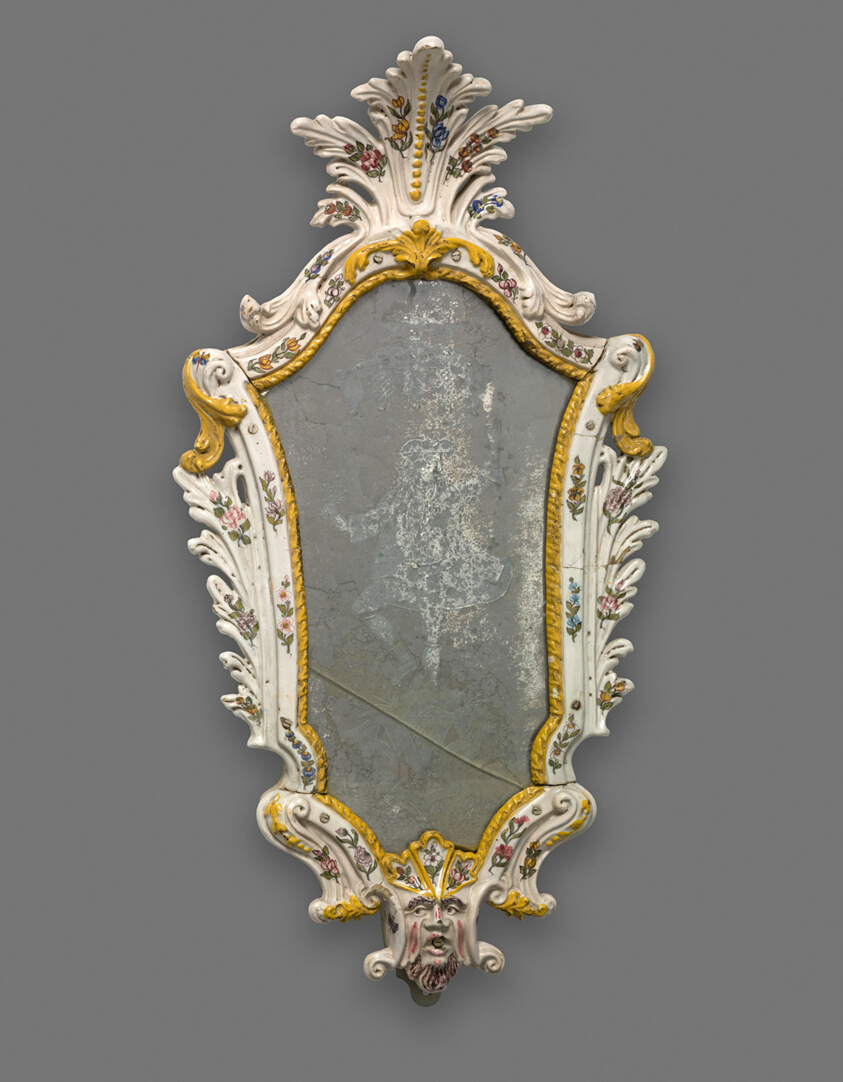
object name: Ceramics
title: Mirror: Male Harlequin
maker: Italy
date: 1740/60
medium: Tin-glazed earthenware (faience) and mirror glass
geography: Italy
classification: mirror; ceramics; earthenware; furniture; european decorative arts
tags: furniture